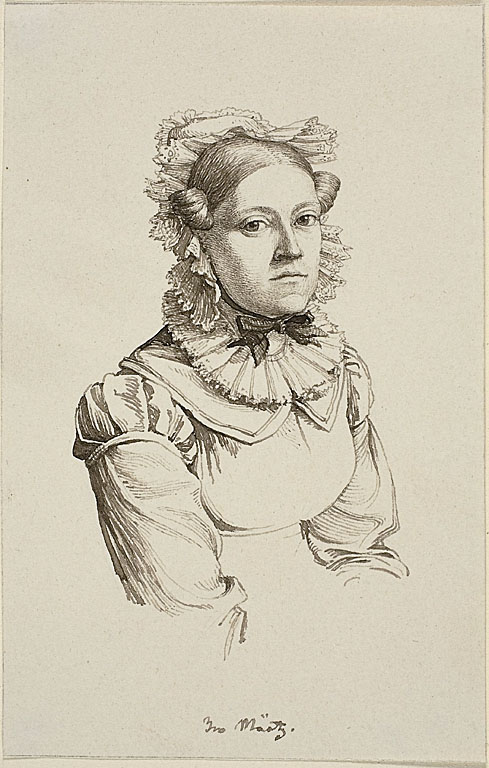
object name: Drawing and Watercolor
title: Bust of Eva Maatz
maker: Gerhardt Wilhelm von Reutern (German, 1794-1865)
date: c. 1827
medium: Pen and brown ink on ivory wove paper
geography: Germany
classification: pen and ink drawings; drawings (visual works); prints and drawing